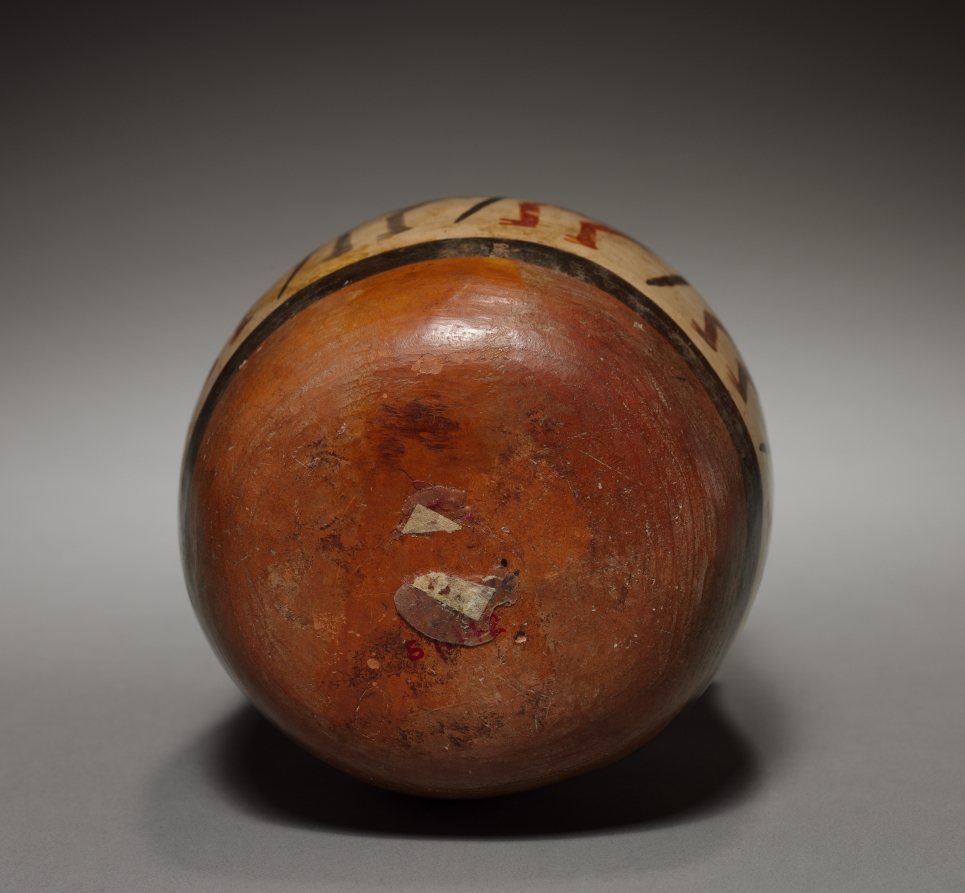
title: Vase with Procession of Warriors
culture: Peru, South Coast, Nasca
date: c. 350–600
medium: earthenware with colored slips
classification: Ceramic